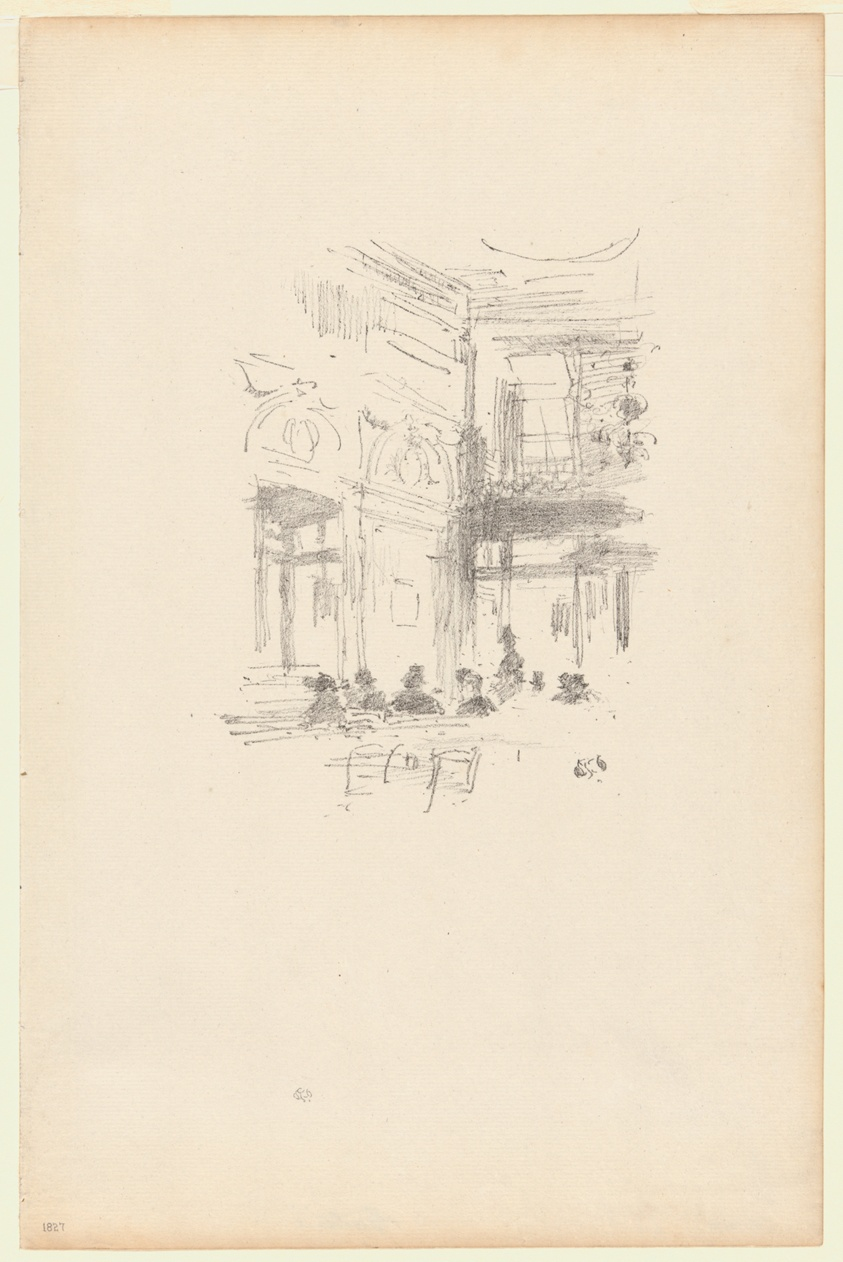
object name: Print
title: Gatti's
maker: James McNeill Whistler (American, 1834-1903)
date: 1890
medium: Transfer lithograph in black on ivory laid paper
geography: United States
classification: transfer lithograph; lithograph; print; prints and drawing; paper